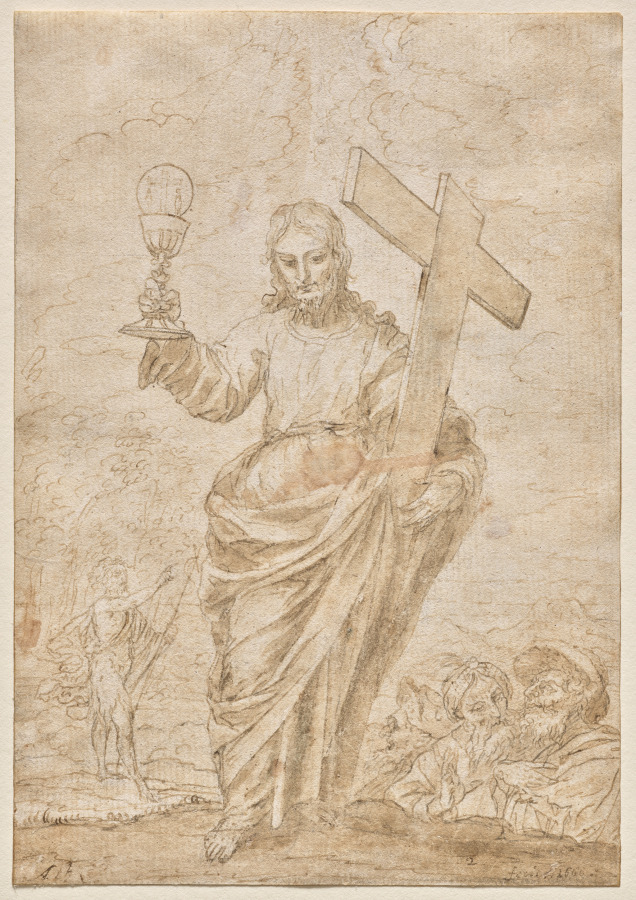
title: Christ Holding a Chalice and Cross (recto)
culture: Spain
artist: Alonso Cano (Spanish, 1601–1667)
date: 1666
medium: pen and brown ink and brush and brown wash on laid paper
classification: Drawing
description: In this drawing a triumphant Christ holds the cross signifying his resurrection, while offering a chalice as a symbol of his blood and sacrifice. In the background, Saint John the Baptist points, identifying Christ as the Lamb (or sacrifice) of God. Alonso Cano was an artist in Baroque Spain who made works primarily in the service of the Catholic Church and Spanish monarchs. Though no related painting is known, the composition is appropriate for an altarpiece, meant as a visual aid to clarify the meaning of the Catholic Mass.